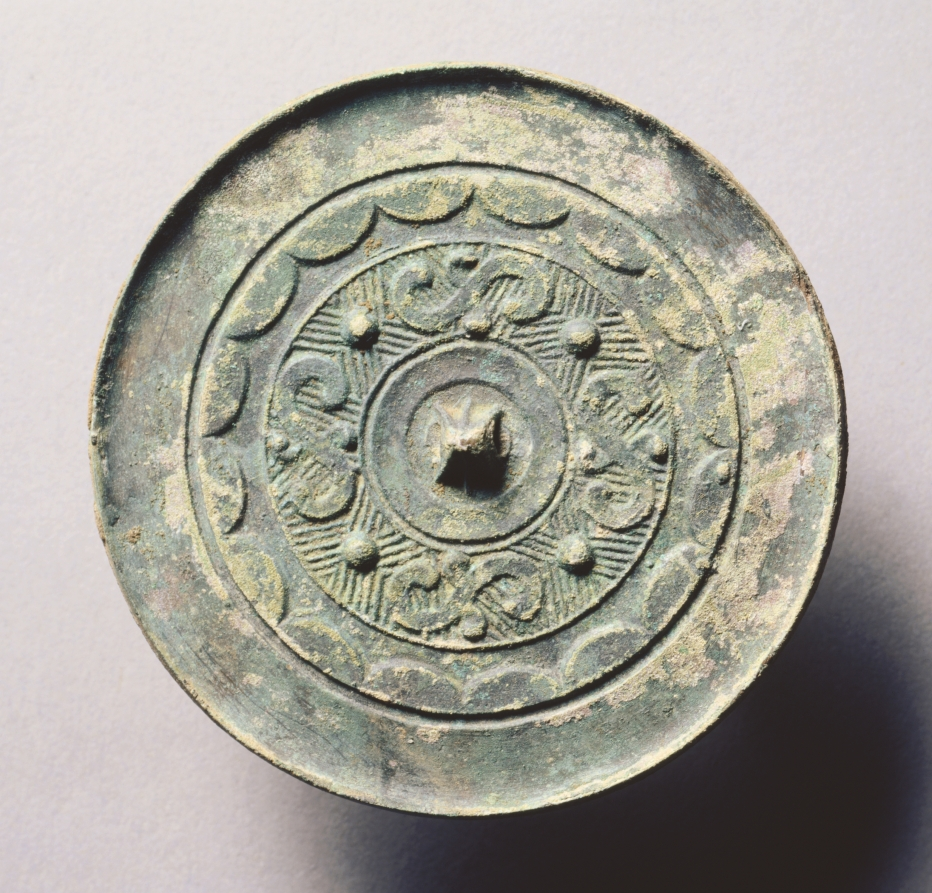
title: Mirror with Four Dragons Pattern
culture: China, Eastern Zhou dynasty (770–256 BCE), Warring States period (475–221 BCE)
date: 500–200 BCE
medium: bronze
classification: Metalwork